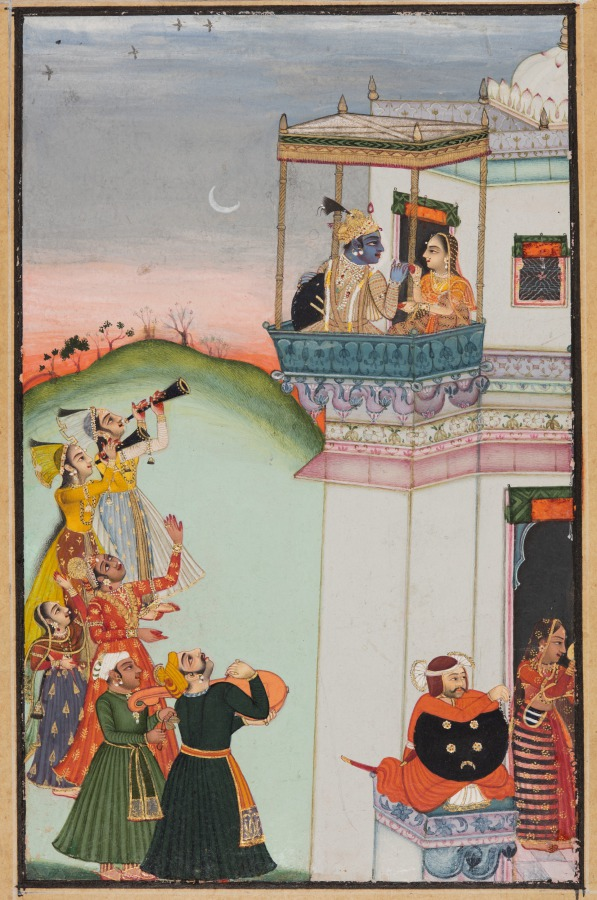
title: Krishna and Consort on a Palace Balcony with Musicians: Vukharo Ragaputra of Bhairav, from the “Boston Ragamala”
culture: Northwestern India, Rajasthan, Rajput Kingdom of Kota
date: 1770–75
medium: gum tempera, ink, silver, and gold on paper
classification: Painting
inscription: 12. bharu kau putra bukhārau ādha gaiṛī dīna caḍhā geve'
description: The mood of this scene is joyous, as the blue-skinned god Krishna sits with his beloved in a high covered balcony. Below, exuberant musicians blow horns and clap time. One man in front plays the cymbals next to the open-mouthed singer on a lute-like instrument. A guard sits relaxed and unworried, counting the beads of his rosary.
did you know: This musical mode is performed at early morning, suggested by the sunrise at the horizon.